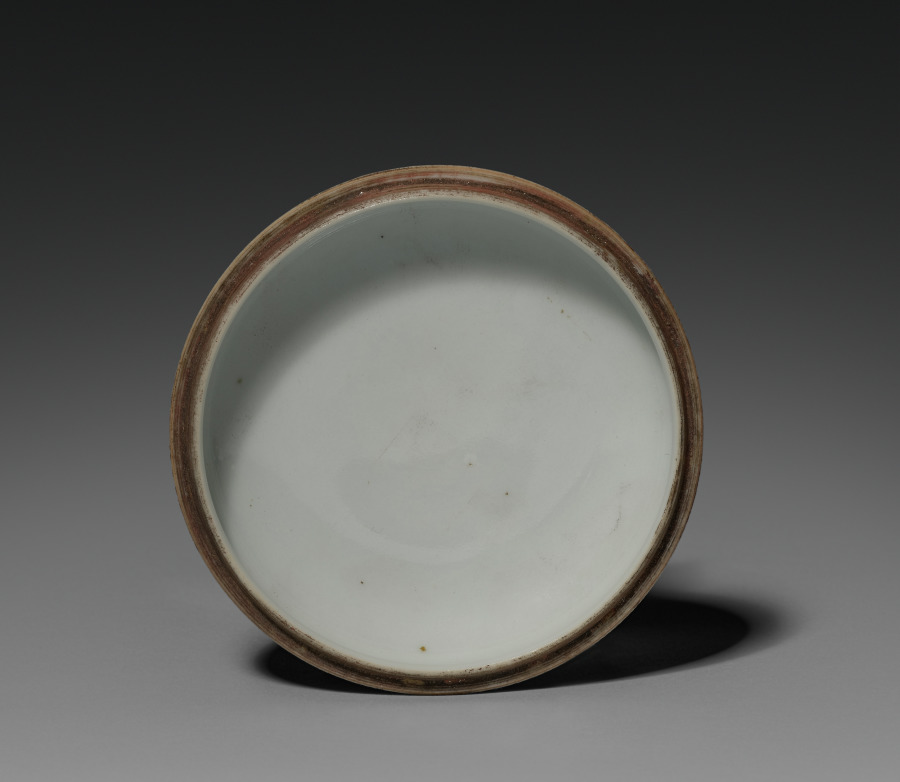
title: Seal Color Box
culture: China, Jiangxi province, Jingdezhen, Qing dynasty (1644-1911), Kangxi period (1662-1722)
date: 1662–1722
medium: porcelain with "peach bloom" glaze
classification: Ceramic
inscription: 大清康熙年制